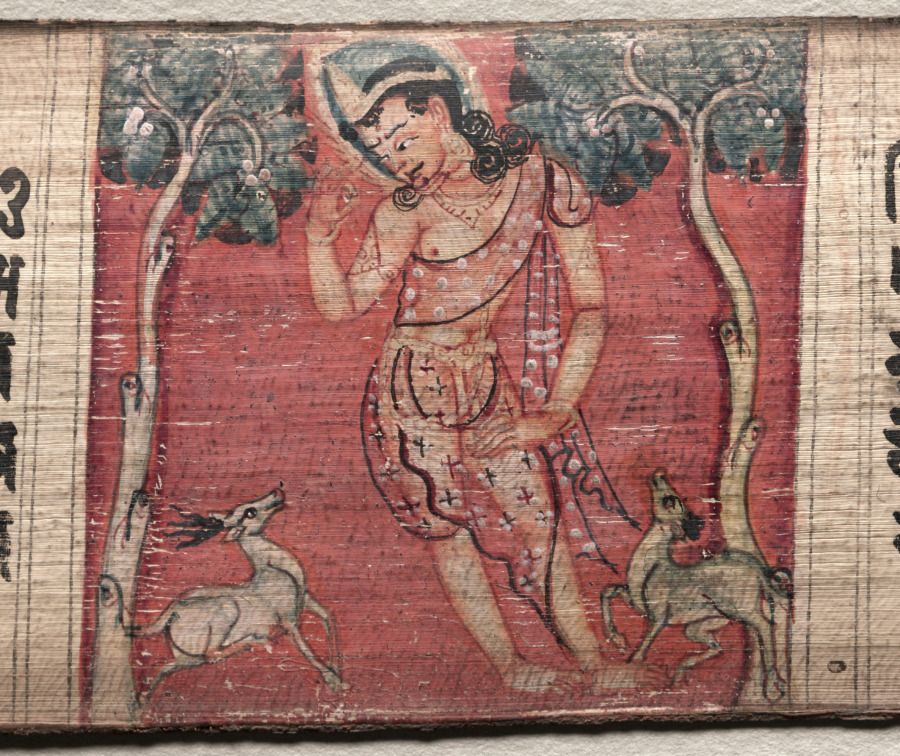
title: Sudhana and a pair of antelopes, folio 37 (recto) from a Gandavyuha-sutra (Scripture of the Supreme Array)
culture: Nepal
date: 1000–1100s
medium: gum tempera and ink on palm leaf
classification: Painting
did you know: The halo of the pilgrim is ringed with flames as he preaches to a pair of deer in the wilderness.